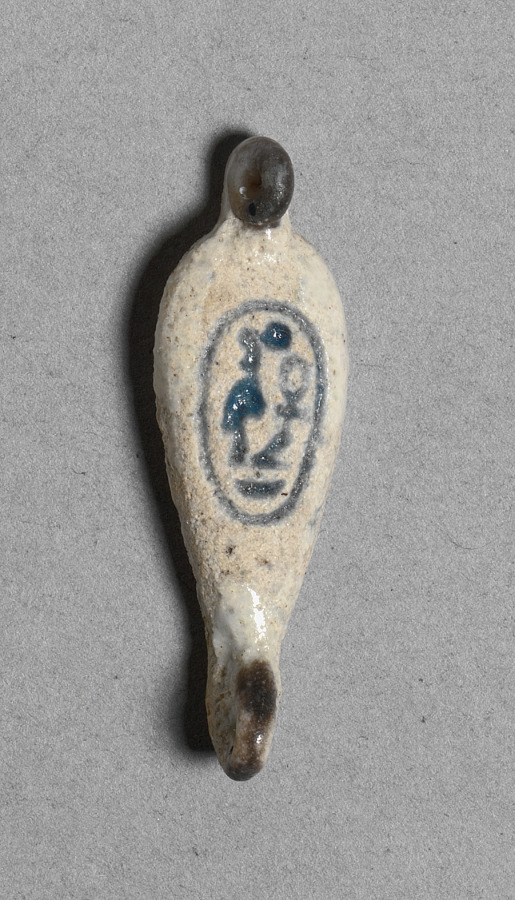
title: Petal-Shaped Bead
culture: Egypt, New Kingdom (1540–1069 BCE), Dynasty 18, reign of Amenhotep III (1390–1352 BCE)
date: c. 1391–1353 BCE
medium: faience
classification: Jewelry